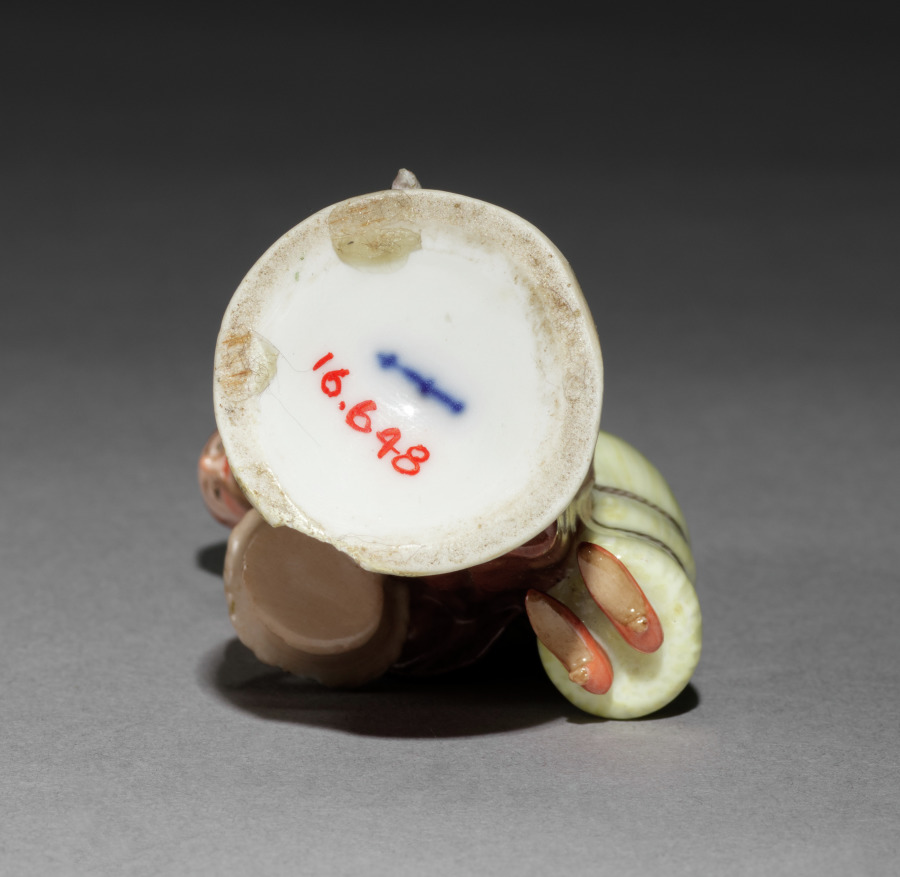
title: Scent Bottle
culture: Germany, Berlin, 18th century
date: 1780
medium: porcelain with gilt metal mounts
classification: Miscellaneous